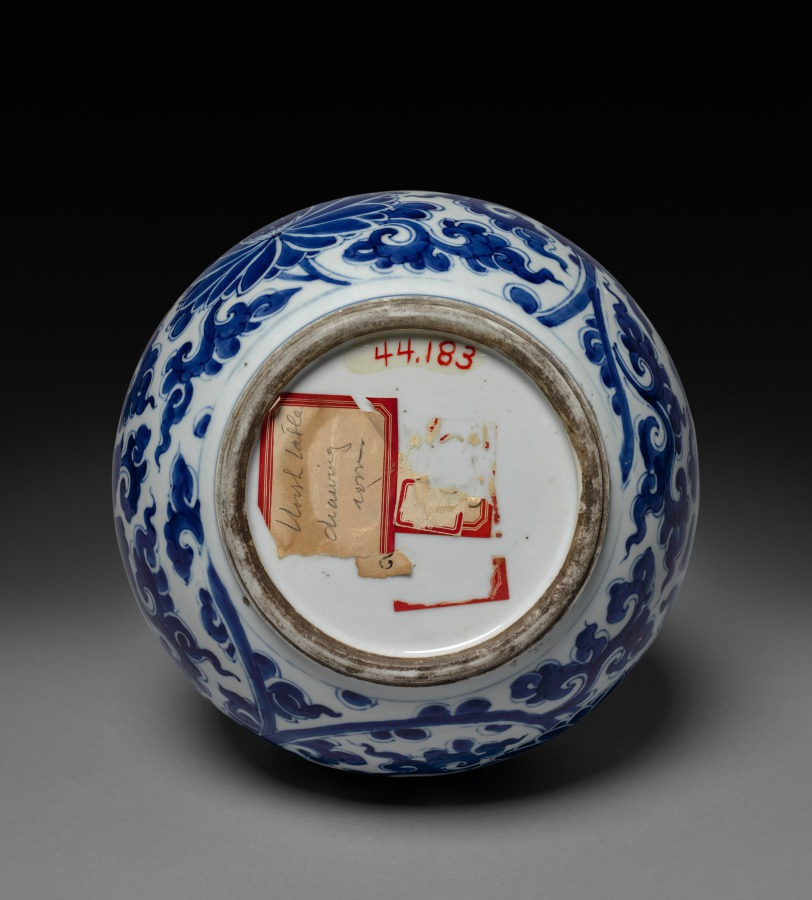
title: Bottle-shaped Vase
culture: China, Qing dynasty (1644-1911), Kangxi reign (1662-1722)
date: 1662–1722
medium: porcelain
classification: Ceramic